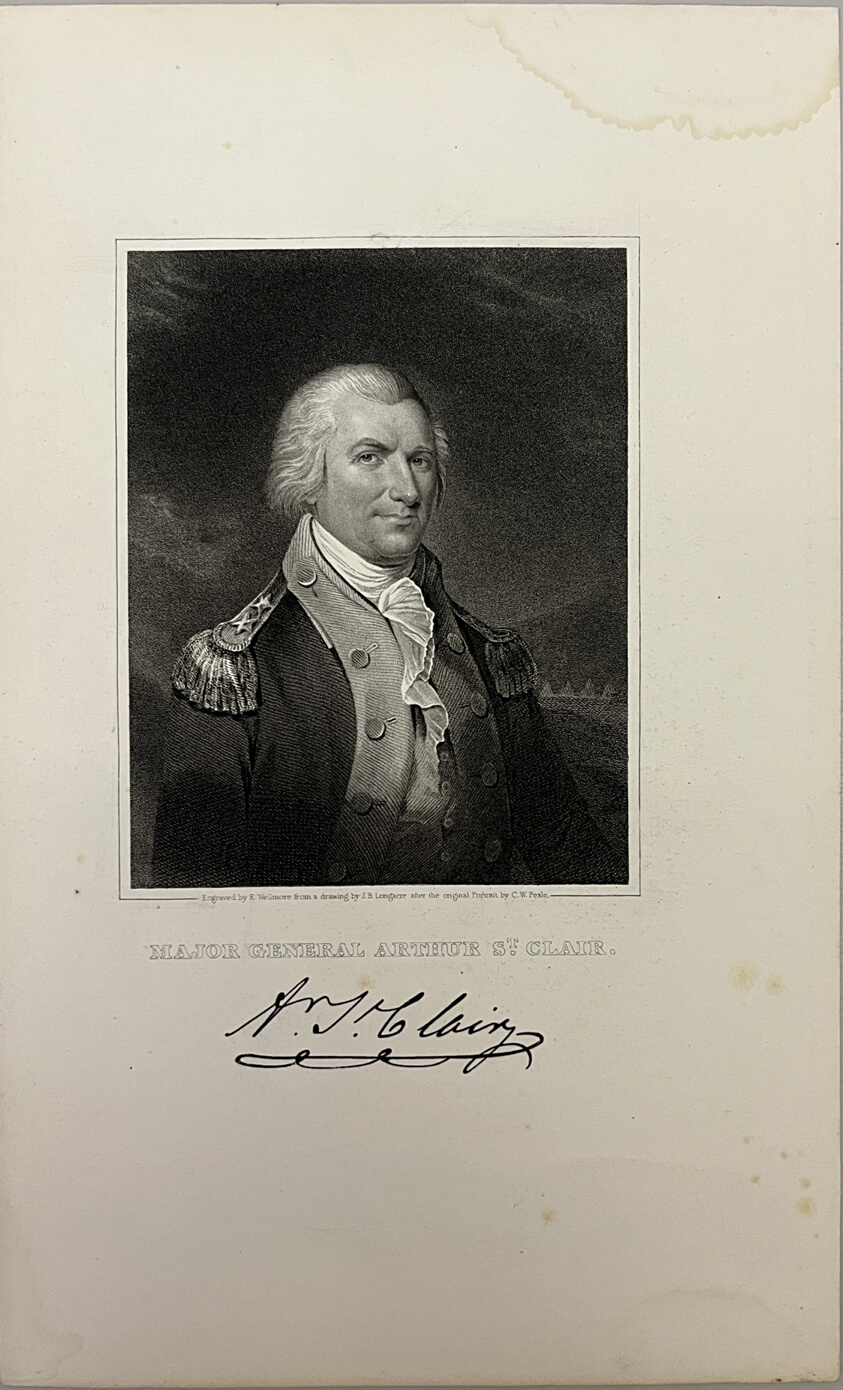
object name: Print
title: Major General Arthur St Clair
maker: Edward Wellmore (American, active mid-19th century); after James Barton Longacre (American, 1794-1869); after Charles Wilson Peale (American, 1741-1827)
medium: Stipple engraving on paper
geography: United States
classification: reproduction; print; prints and drawing